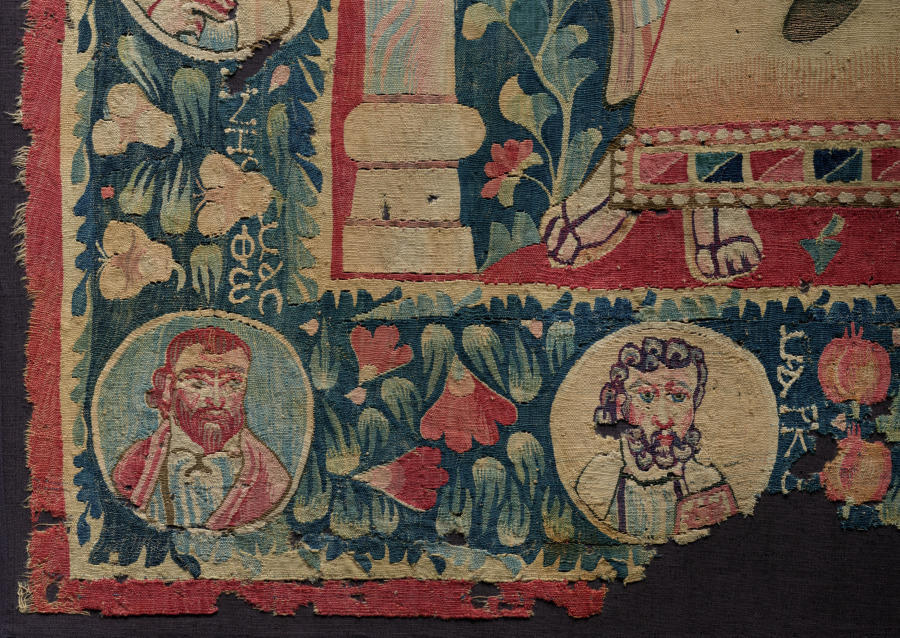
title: Icon of the Virgin and Child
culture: Egypt, Byzantine period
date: 500s CE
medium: wool and dye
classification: Textile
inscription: on the lintel of the architectural setting, the Greek inscription translates as: The Holy Michael, The Holy Mary, The Holy Gabriel. The wide foliate border is decorated with fruits and flowers and, in the lower part, with medallions containing the busts of apostles whose names are inscribed nearby in Greek and are translated as: Andrew, Matthew, Paul the Apostle, Luke, James, Phillip, Mark, Thomas, John, Matthias, Peter, and Bartholomew.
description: Woven from more than 20 colors of woolen thread, this rare tapestry was more expensive than a painting when it was made. The historical price reflected contemporary viewers’ appreciation for the skilled color blending by the weavers. Hung on a wall, this tapestry allowed viewers to venerate (honor) the Virgin Mary and the Christ Child in the Christian Orthodox church. Angels and apostles surround them, their names written in Greek. To be spiritually effective, an icon (devotional image) should follow its subject’s established visual tradition as closely as possible.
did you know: Created in Egypt's hot and dry desert climate, this tapestry features a border of lush greenery and fruits, while flowers peek out from around the throne of the Virgin. Imagine encountering this artistic oasis in a Coptic church during the dry heat of the day.